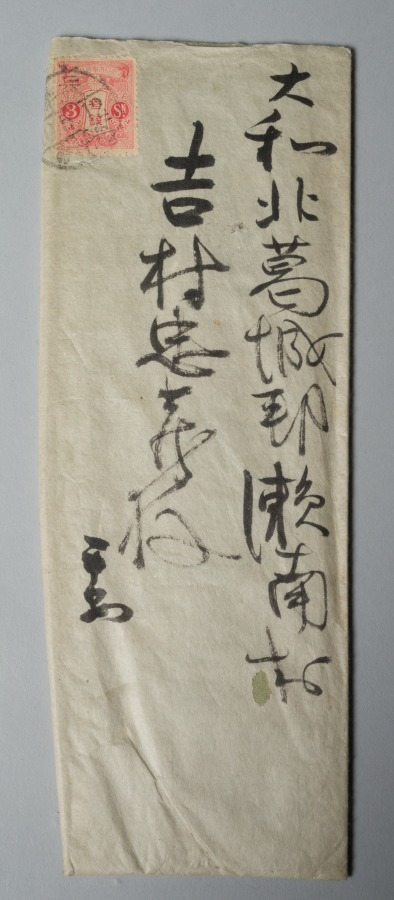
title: Courtesan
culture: Japan, Edo period (1615–1868)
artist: Matsuno Chikanobu (Japanese, active 1716–35)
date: 1716–35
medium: hanging scroll; ink and color on paper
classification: Painting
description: A glamorous courtesan sports an outer robe decorated with large roundels featuring plant motifs including iris and bush clover. Little is known about the life and artistic training of the painter Matsuno Chikanobu, an ukiyo-e artist who painted in a style strongly reminiscent of that of the Kaigetsudō studio. Many of his known paintings are on silk, and executed with high quality pigments, indicating that his primary clientele were wealthy individuals.